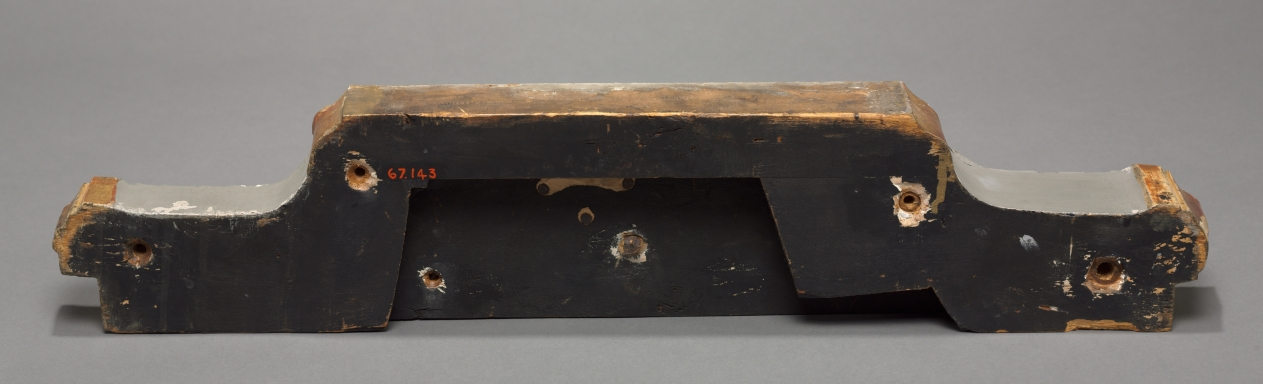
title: Pedestal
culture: Italy, Rome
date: mid-1700s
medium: carved, gilded, and painted wood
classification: Furniture and woodwork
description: The coat of arms on this pedestal is that of Cardinal York, the last of the Stuart pretenders to the British throne. He lived out his years in Rome, where he had been made a cardinal of the Church.